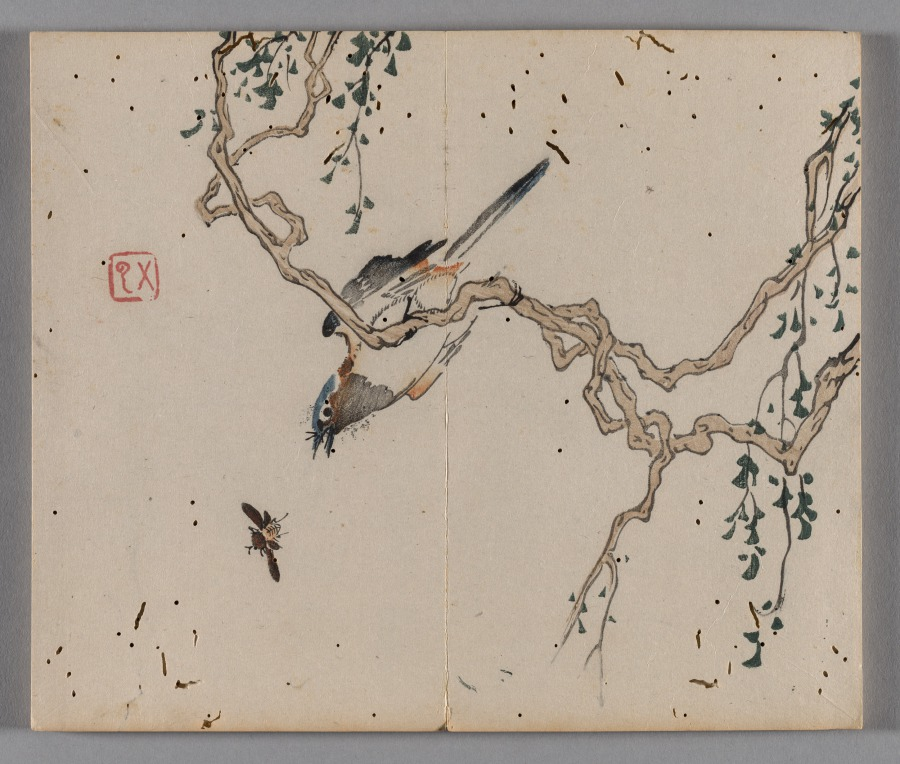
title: Ten Bamboo Studio Painting and Calligraphy Handbook (Shizhuzhai shuhua pu): Birds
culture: China, Qing dynasty (1644-1911)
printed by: Hu Zhengyan (Chinese, c. 1584–1674)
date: 1633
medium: Woodblock-printed book; ink and colors on paper; first edition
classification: Print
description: Color printing reached a level of perfection in the early 1600s, as seen in this Ten Bamboo Studio Collection of Calligraphy and Painting and the Mustard Seed Garden Manual of Painting (printed 1679 and 1701). The painterly quality, precision in registering (aligning) the woodblocks, and harmonious colors made them the most successful color print editions in Chinese history. Both editions were printed and compiled in Nanjing, spread nationwide, and had a great impact on the arts in Japan and Korea.